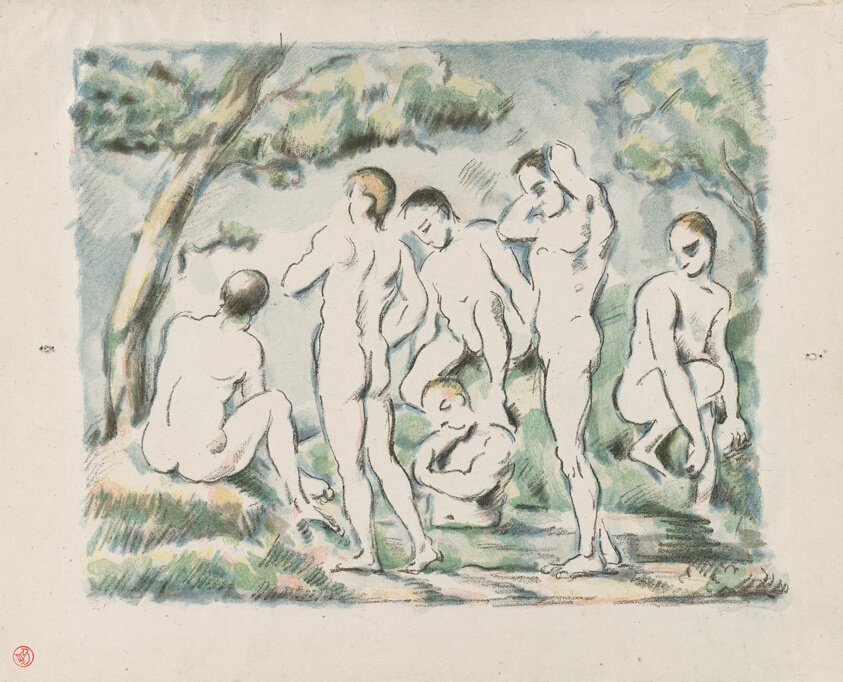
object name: Print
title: Small Bathers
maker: Paul Cézanne (French, 1839–1906); printed by Auguste Clot (French, 1858–1936)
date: 1896–97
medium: Color lithograph on ivory China paper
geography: France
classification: lithograph; print; prints and drawing